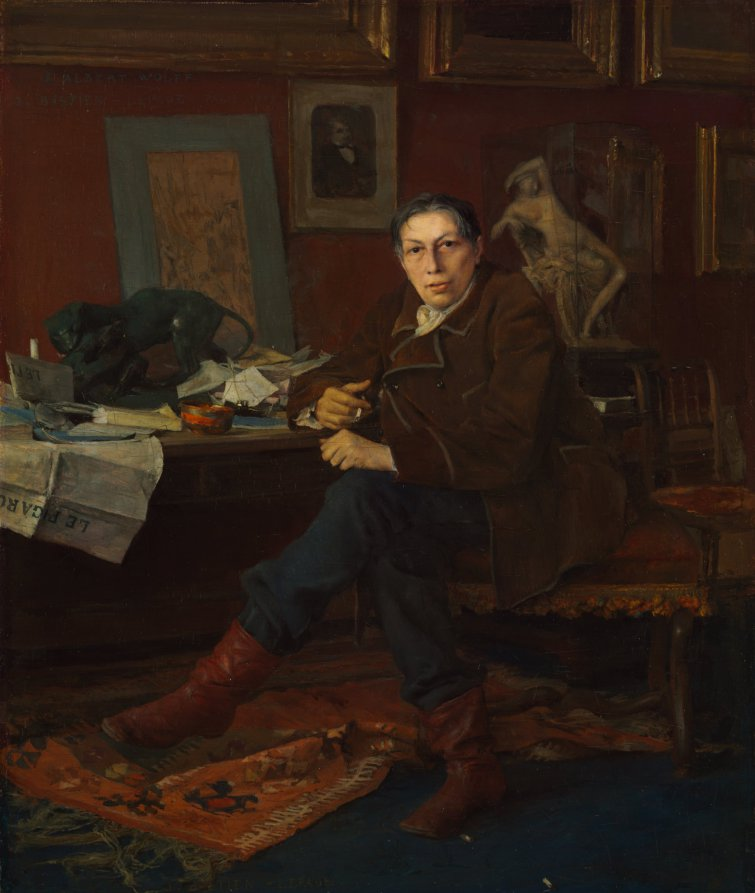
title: Albert Wolff in His Study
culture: France, 19th century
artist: Jules Bastien-Lepage (French, 1848–1884)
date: 1881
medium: oil on panel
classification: Painting